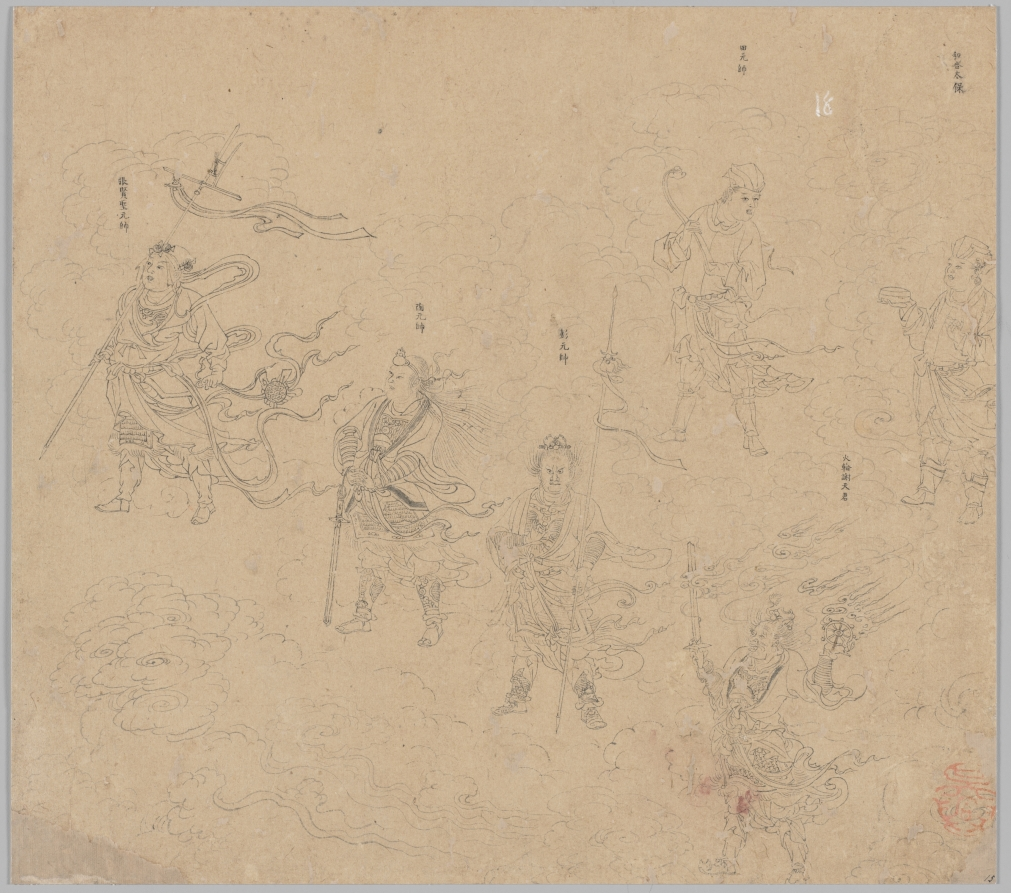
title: Album of Daoist and Buddhist Themes: Procession of Daoist Deities: Leaf 15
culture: China, Southern Song dynasty (1127-1279)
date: 1200s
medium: Album, ink on paper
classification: Painting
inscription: 和合太保; 火輪謝天君; 田元帥; 彭元帥; 陶元帥; 張賢聖元帥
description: Four Field Marshals of the Daoist pantheon dressed in military garb are, from right to left, Tian 田元帥, Peng 彭元帥, Tao Yuanxin 陶元信, and Zhang Xiansheng 張賢聖. Hehe Grand Guardian 和合太保 and Heavenly Lord Xie Shirong 謝仕榮 in the upper row are each more simply dressed in a cap and robe tied at the waist.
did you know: Hehe Grand Guardian 和合太保 holds a ruyi scepter.